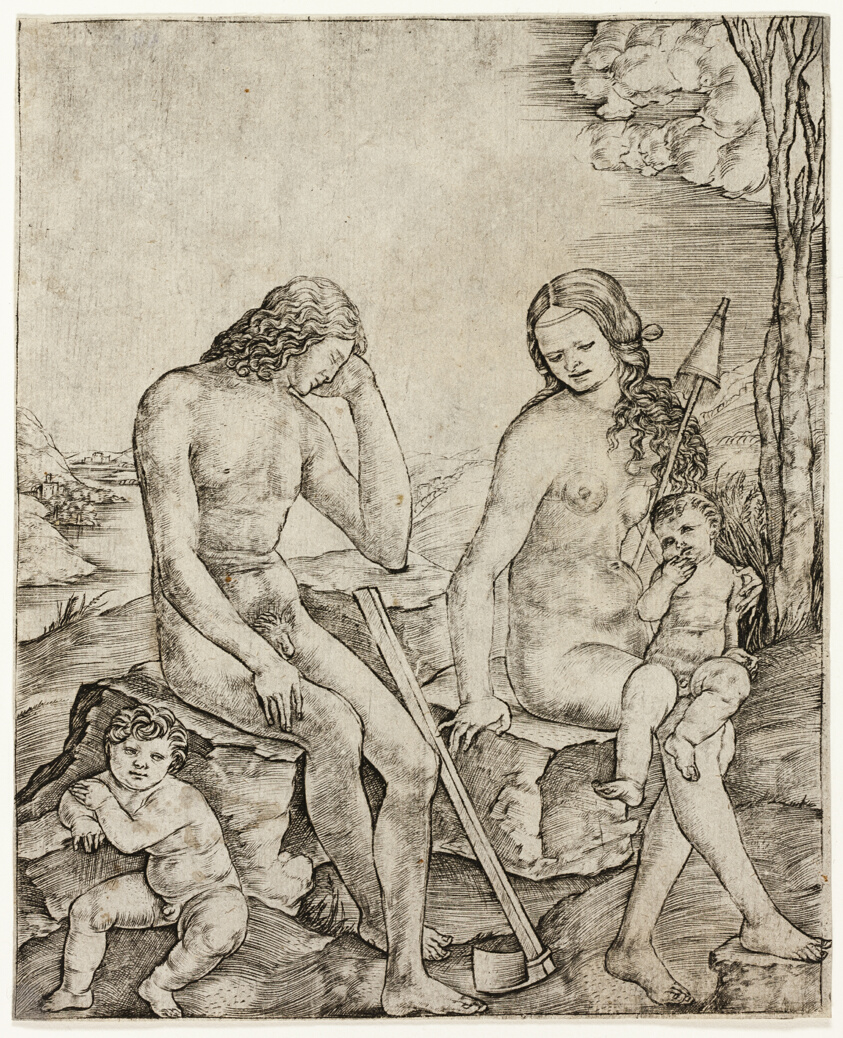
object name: Print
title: Adam and Eve with Infants Cain and Abel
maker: Cristofano Robetta (Italian, 1462-c.1535)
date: c. 1500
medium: Engraving on paper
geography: Italy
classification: engraving; print; prints and drawing